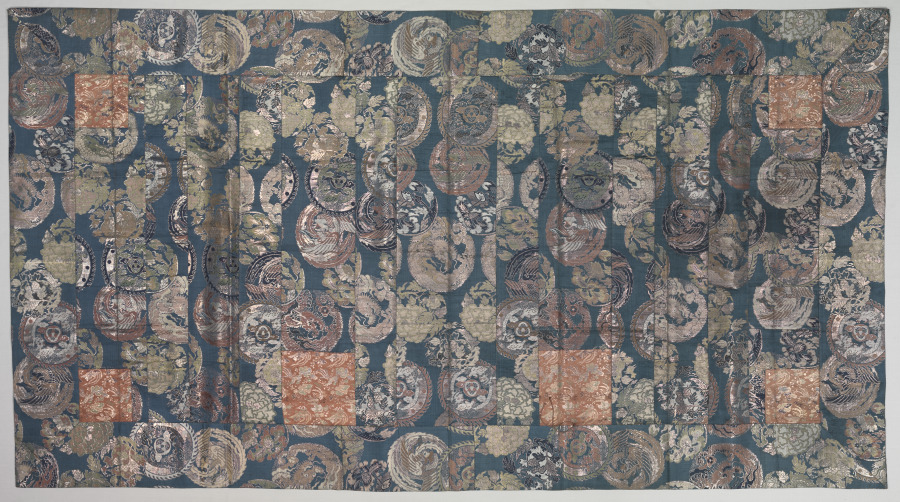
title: Buddhist Surplice (Kesa)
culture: Japan, Meiji period (1868–1912)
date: early 1900s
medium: silk with supplementary weft, brocaded; metal thread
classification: Garment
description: The kesa is a Buddhist monk’s vestment worn folded and draped over one shoulder, and fastened over the chest. In keeping with the austere conditions of monastic life, kesa were traditionally fashioned from remainders of donated garments sewn together into a series of columns. The wider, central column symbolizes the Buddha. The orange squares with a phoenix and flower pattern in each corner represent the deities who guard the four directions, while the two at the top on either side of the central column symbolize attendant bodhisattvas, or the Nio, guardians who protect the Buddhist Law. This kesa is sewn from a textile with bold roundels with dragon and phoenix motifs.